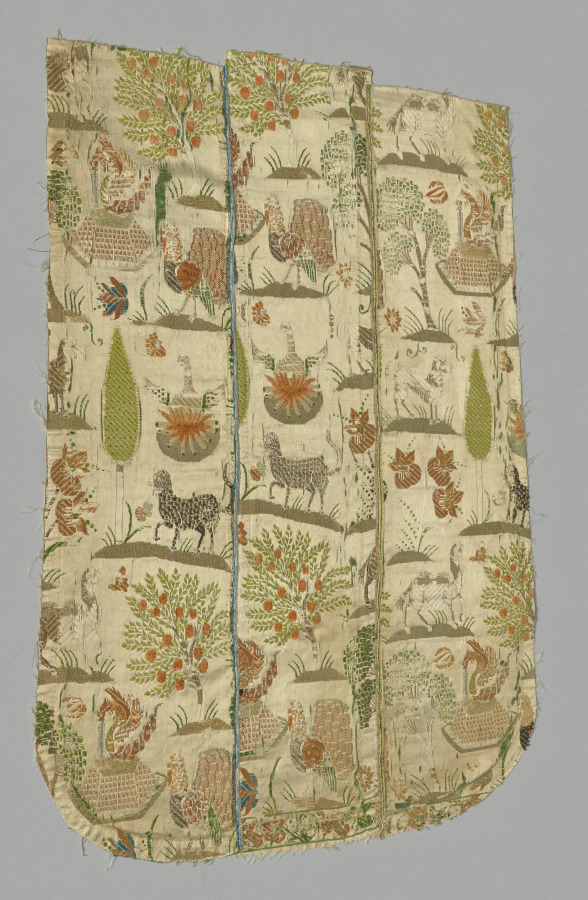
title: Half Chasuble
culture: Spain, Valencia, 18th century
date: 18th century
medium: plain compound cloth, brocaded; silk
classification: Textile